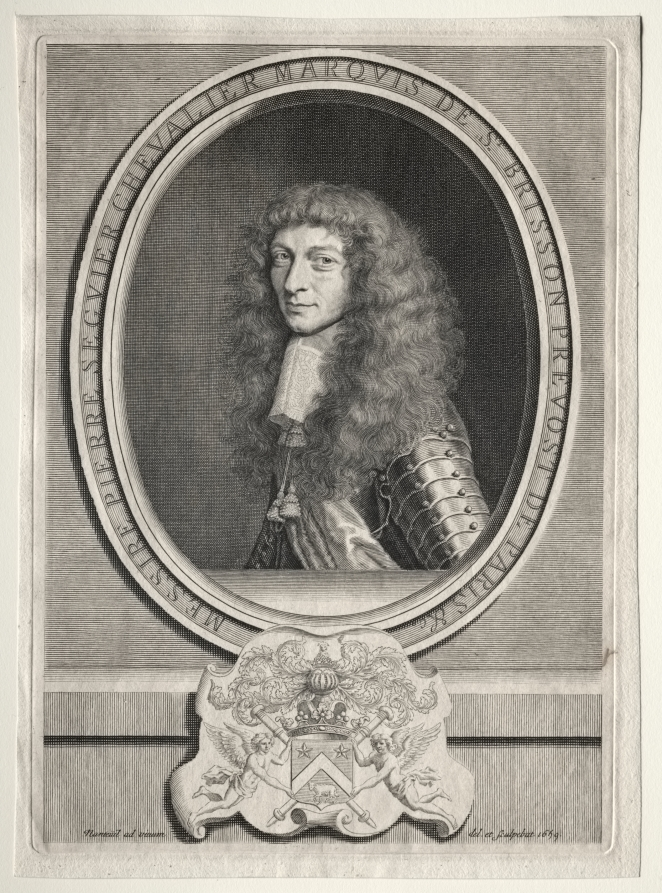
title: Pierre Seguier Chevalier, Marquis de St. Brisson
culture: France, 17th century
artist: Robert Nanteuil (French, 1623–1678)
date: 1659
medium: engraving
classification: Print